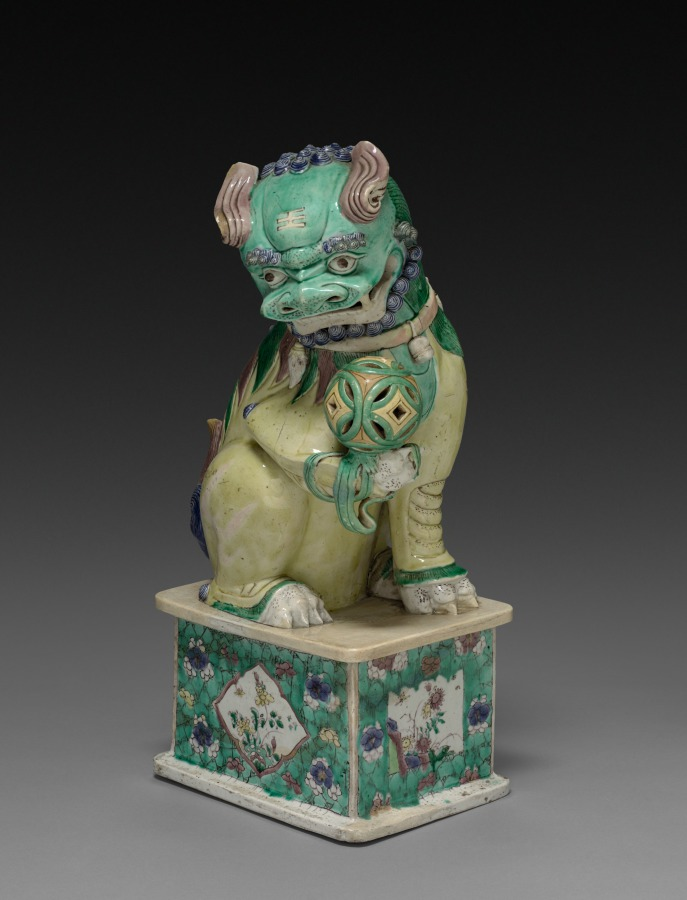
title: Lion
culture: China, Qing dynasty (1644-1911), Kangxi reign (1661-1722)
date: 1662–1722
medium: porcelain with overglaze enamel decoration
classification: Sculpture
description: This porcelain lion is a pair with 1930.642. This lion holding a ball is considered male, while the nurturing female is depicted with a cub. Guardian lions were traditionally placed in front of buildings to protect from harmful spiritual or human forces.